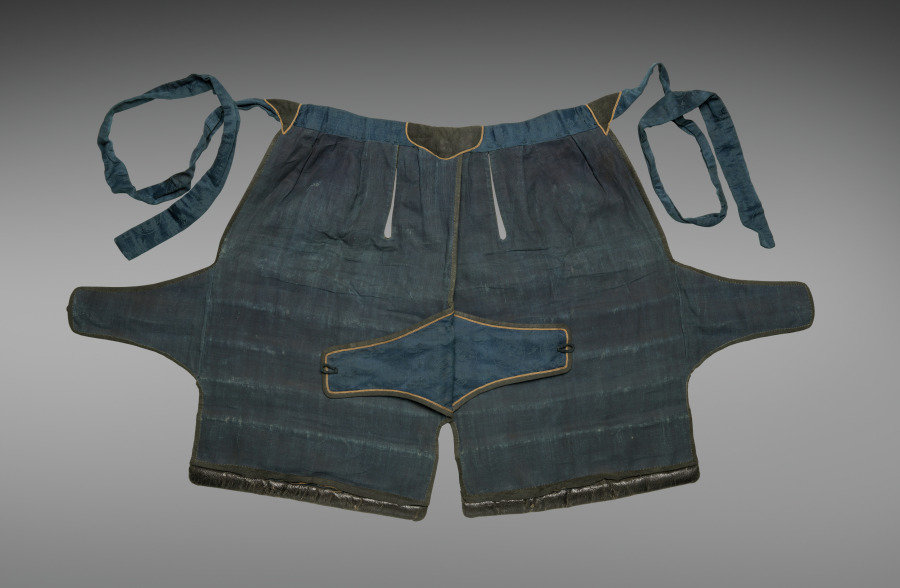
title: Armored Skirt (Haidate)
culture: Japan, Edo period (1615–1868)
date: 1600s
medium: Iron, lacquer, textile (silk)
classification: Arms and Armor